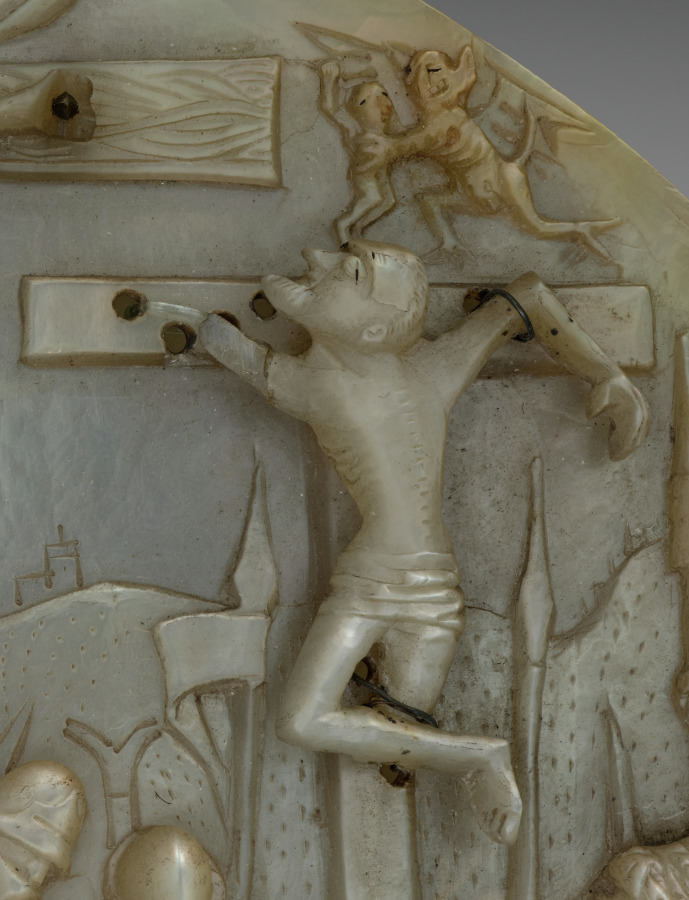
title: Calvary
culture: Germany, Middle Rhine?, 15th century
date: c. 1450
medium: mother-of-pearl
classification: Sculpture